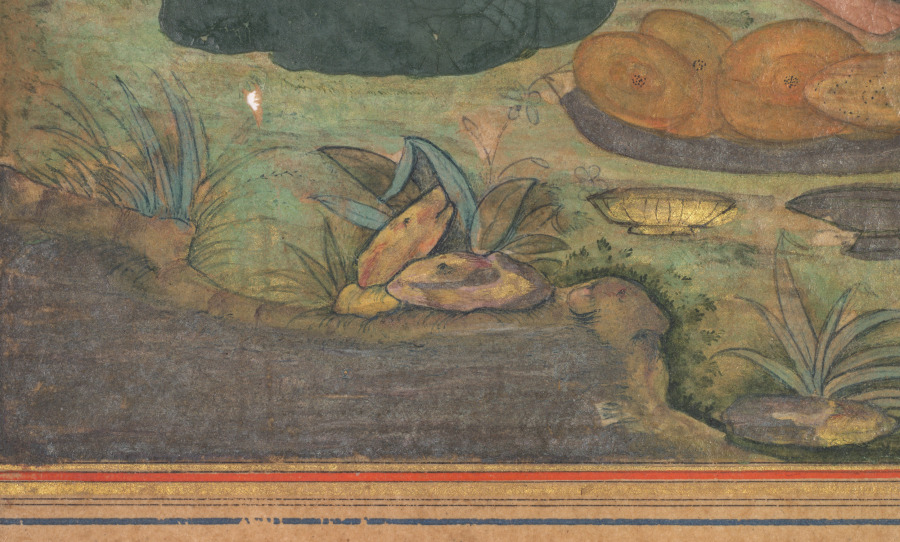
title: Angels bring food to Jesus in the wilderness (folio 55 recto), from a Mirror of Holiness (Mir’at al-quds) of Father Jerome Xavier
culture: Mughal India, Allahabad, made for Prince Salim (1569–1627)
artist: Muhammad Sharif (Indian, active c. 1600)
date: 1602–4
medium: Gum tempera, ink, color, and gold on paper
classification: Manuscript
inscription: Signature of the artist, Muhammad Sharif (Indian, active c. 1600), is written in the tiny pot by Jesus's foot.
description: To end his 40-day fast, five angels brought Jesus refreshments from heaven: breads, melons each with a knife for convenient cutting, fresh leeks, and what appear to be fragrant rice dishes and curries, along with cups of wine. Four of the angels are dressed in robes, and one is clothed only in feathers. After his baptism, Jesus spent 40 days and nights in the desert where he fasted, practiced spiritual exercises, and successfully resisted the temptations of Satan. Many of the rocks in this painting have faces, called grotesques. This page is the only surviving folio from this manuscript that has an artist’s signature, written in the tiny pot by Jesus’s foot.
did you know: The artist has put faces in the rocks, following a Persian convention.